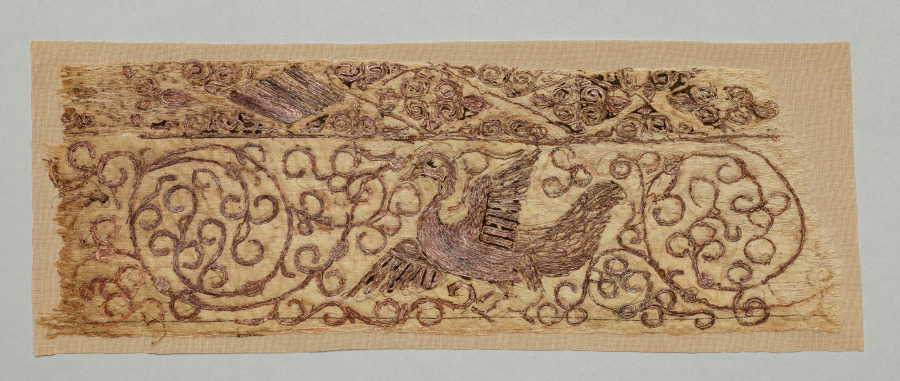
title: Embroidered fragment with bird among vines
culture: Iraq, Baghdad, Seljuq period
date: 1100s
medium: plain weave: silk warp and cotton weft (mulham); embroidery, couched and split stitches: silk and metallic thread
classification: Textile